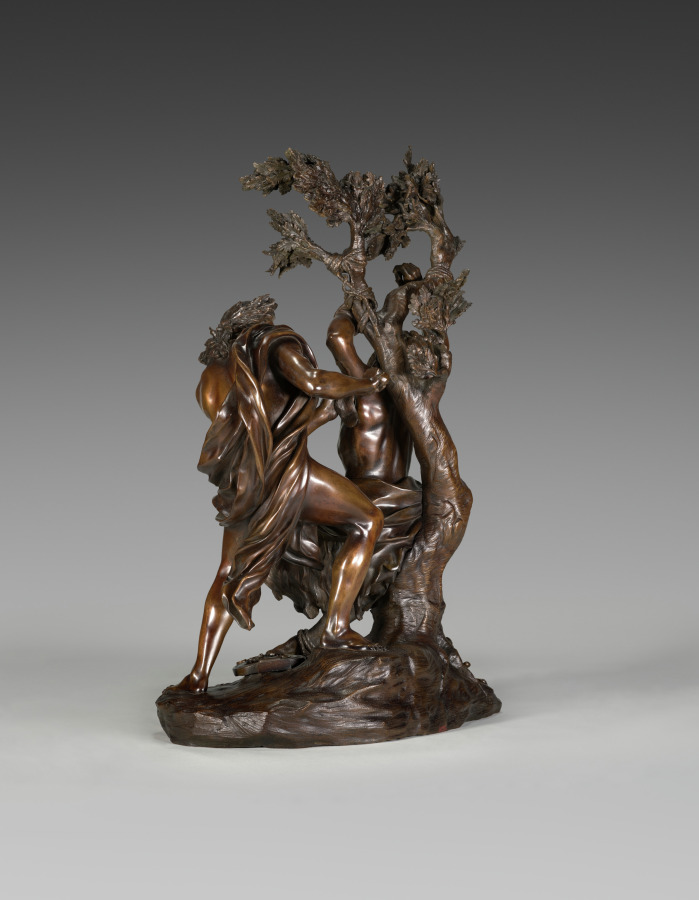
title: Apollo Flaying Marsyas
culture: Italy, Florence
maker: Giovanni Battista Foggini (Italian, 1652–1725)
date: c. 1691–1700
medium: Bronze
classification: Sculpture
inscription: 1136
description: According to myth, the overconfident satyr (half-goat, half-man) Marsyas challenged Apollo, god of the arts, to a musical duel. The defeated Marsyas was tied to a tree and skinned alive in punishment for his pride. Foggini’s bronze captures the moment after Apollo’s victory as the bound Marsyas cries out in agony while the god makes the first incision. The satyr’s anguish is echoed by the gnarled branches; Apollo’s wrath is manifested in his billowing drapery.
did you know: The lyre with which Apollo outperformed Marsyas can be seen between his feet, cast down upon his victory.